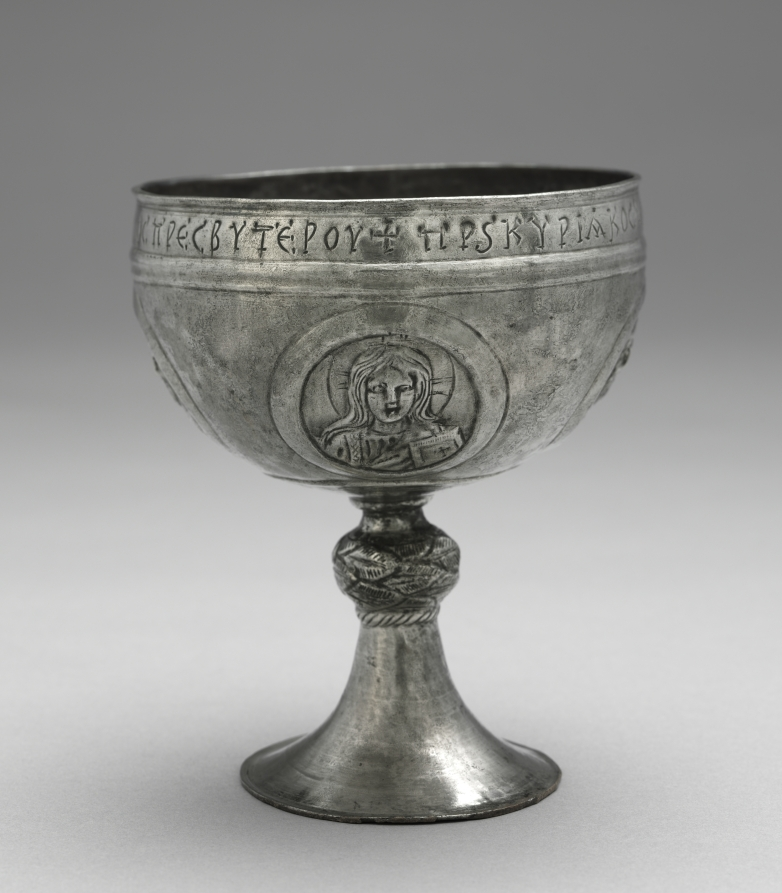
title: Chalice from the Beth Misona Treasure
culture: early Byzantium, Constantinople or Syria, Byzantine period, 6th-7th Century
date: c. 500–700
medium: silver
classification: Metalwork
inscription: the Greek inscription at the top, under an engraved line translates as: + The priest, KYRIAKOS, son of DOMNOS, (gave this chalice) to St. Sergios, in the time of Zeno the priest.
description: These four liturgical silver vessels—a paten and three chalices (1950.378–81)—form what is now called the Beth Misona Treasure, named for the village in northern Syria for which the objects were made. While nothing is known about the exact location and circumstances of the treasure's discovery, the people of the village of Beth Misona were, like other Christian communities in Syria and Palestine, probably forced to bury their church silver to hide it from the Persians or Arabs, who conquered their lands in the first half of the 600s. The paten, which held pieces of Eucharistic bread used during Mass, is decorated with an engraved Latin cross surrounded by a dedicatory inscription that names the paten's donor—Domnos—and its original location, the church of Saint Sergios in Beth Misona. The chalices, which contained the Eucharistic wine used during Mass, feature broad cups decorated with portrait busts of Saints Peter and Paul, Christ, and the Virgin. One chalice bears a dedicatory inscription naming its donor—Kyriakos, Domnos's son—and the priest of the church that received the pious gift—Zeno.